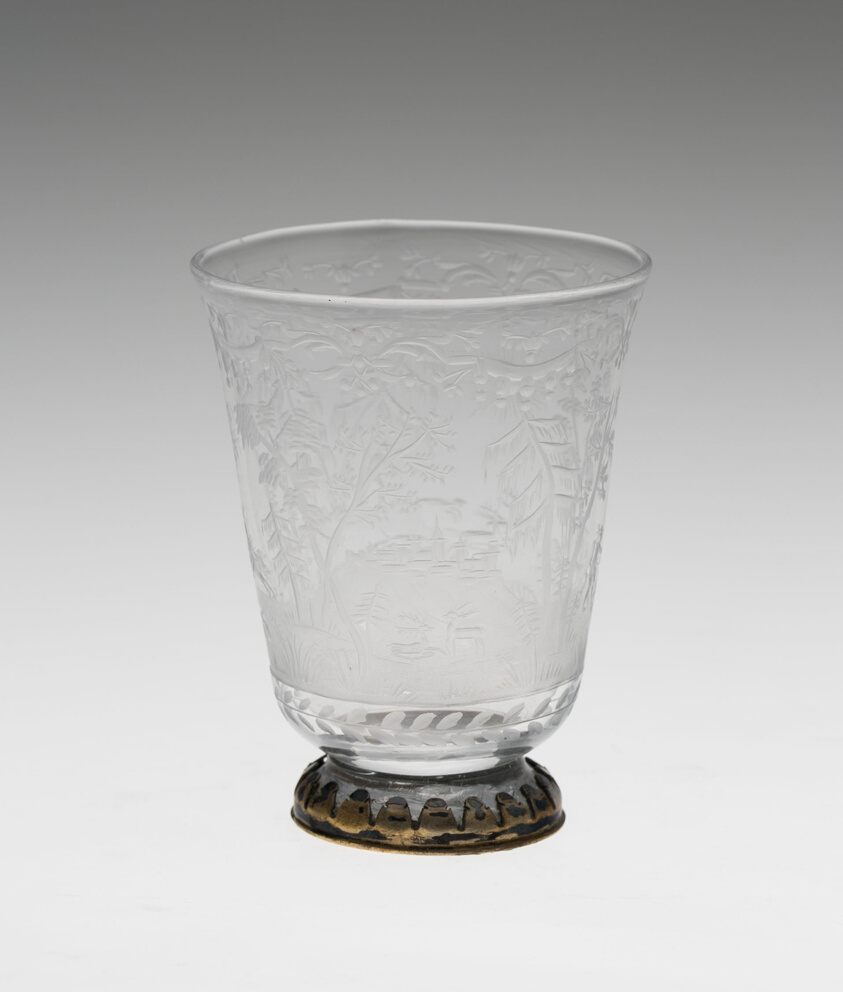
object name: Glass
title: Beaker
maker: Bohemia, Czech Republic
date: Early 18th century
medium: Glass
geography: Bohemia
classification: drinking vessel; glass; european decorative arts